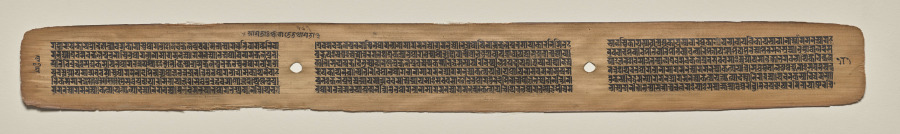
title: Text, folio 181 (verso), from a Manuscript of the Perfection of Wisdom in Eight Thousand Lines (Ashtasahasrika Prajnaparamita-sutra)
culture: Eastern India, Bihar, Vikramashila Monastery. Painting: Nepal, Kathmandu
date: Sunday, September 14, 1119 (year 239 of the Newar Samvat in the month of Ashvina)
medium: gum tempera and ink on palm leaves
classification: Painting